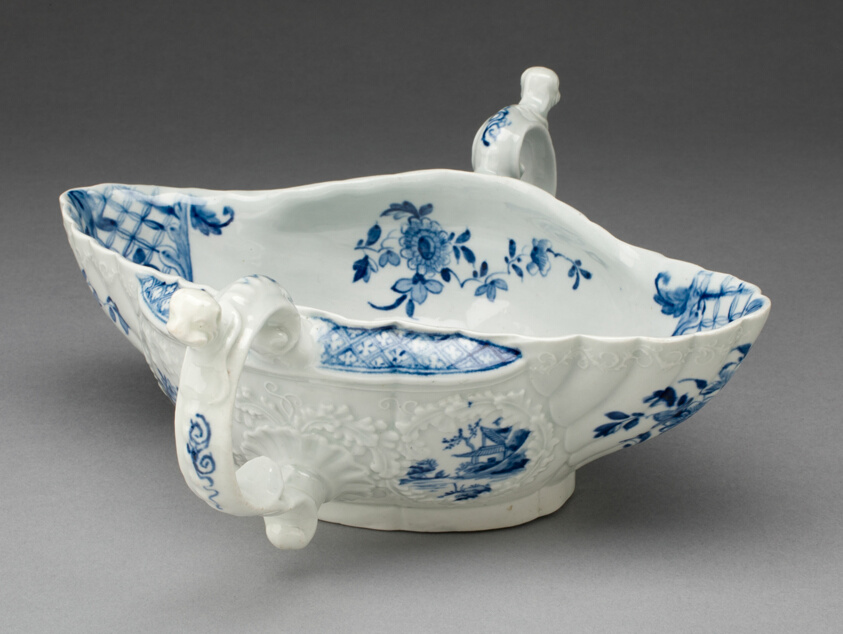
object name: Ceramics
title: Two-Handled Sauceboat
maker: Worcester Porcelain Factory (Warmstry House Period, 1751–1783); Worcester, England, founded 1751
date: c. 1755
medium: Soft-paste porcelain with underglaze blue decoration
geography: Worcester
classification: ceramics; tableware; porcelain; european decorative arts